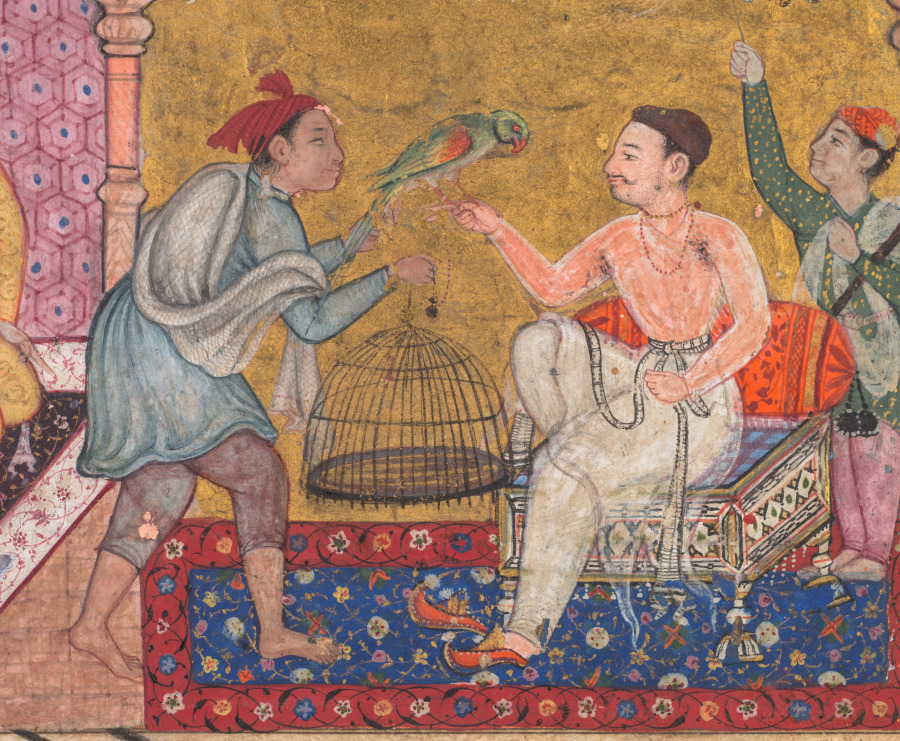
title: The hunter offers the mother parrot to the king of Kamarupa, from a Tuti-nama (Tales of a Parrot): Fifth Night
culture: Mughal India, court of Akbar (reigned 1556–1605)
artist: Basavana (Indian, active c. 1560–1600)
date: c. 1560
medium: gum tempera, ink, and gold on paper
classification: Painting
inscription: 'amal basāwan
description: The king of Kamarupa, which ironically means “body of erotic love,” had leprosy. The hunter brought the captured mother parrot to the king, assuring him that the bird knew a cure. The lavish use of gold indicates that this book was a costly production. The figure of the hunter reveals the talents of the artist Basavana, whose name is written in the right margin. Draped in rustic garments shaded to appear softly flowing, the hunter bends forward with a subtle look of shrewd expectancy as the king seems ready to pay a high price for the parrot. The billowing red curtain is one of Basavana’s signature motifs. Beyond is a tantalizing glimpse of the forest to which the parrot will soon escape to rejoin her children.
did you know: This leper king ruled a territory that stretched from Bhutan to Assam and Bengal.